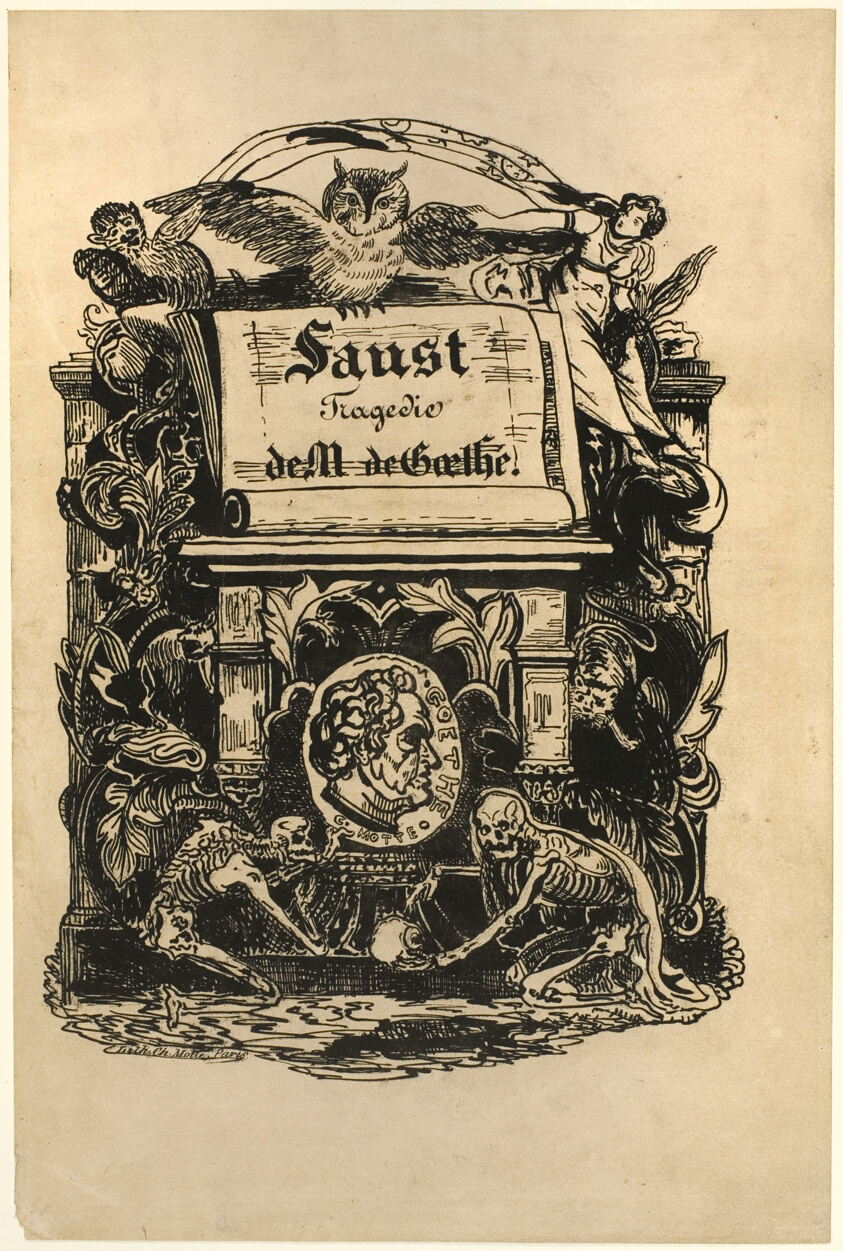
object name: Print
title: Portrait Medallion of Goethe, title page from Faust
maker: Achille Devéria (French, 1800-1857); Eugène Delacroix (French, 1798-1863)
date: 1828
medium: Lithograph in black on light pink wove paper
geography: France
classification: lithograph; print; prints and drawing